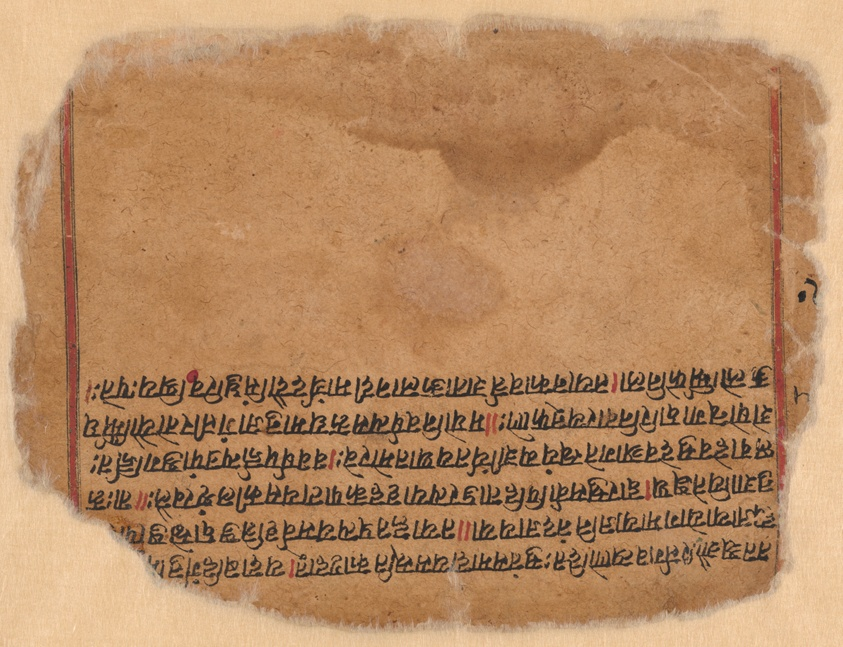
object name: Painting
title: The Infant Krishna Spirited Away by Vasudev, from a copy of the Dispersed Bhagavat Purana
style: South Asian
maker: India; Delhi-Agra region, possibly Mathura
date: c. 1520–1530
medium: Opaque watercolor on paper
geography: India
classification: gouache; painting; asian art